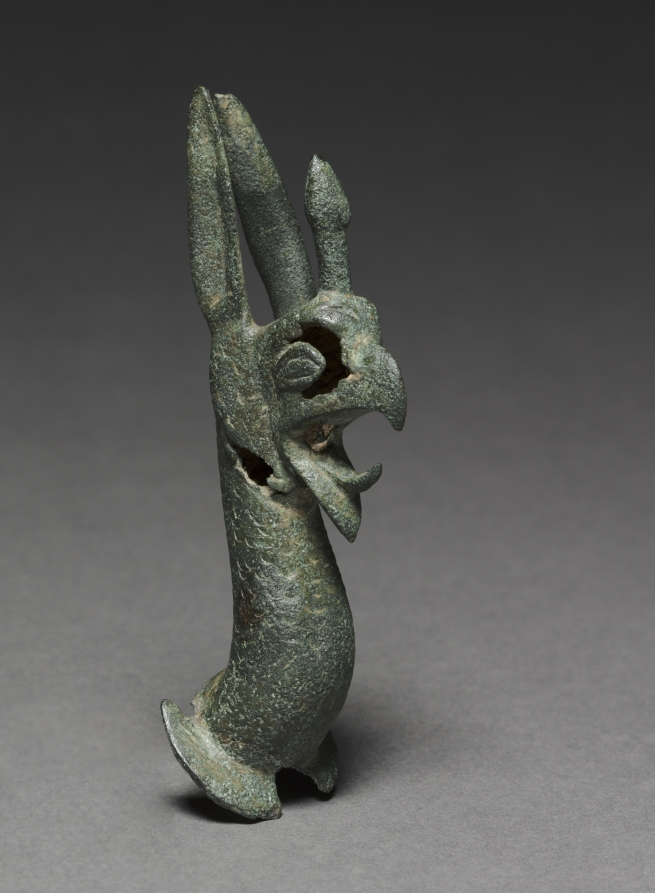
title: Griffin Protome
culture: Greece, Ionian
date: 625–575 BCE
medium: bronze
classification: Metalwork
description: This bird-like head and neck, with sharp beak and tongue, belongs to a griffin, a fantastic bird/lion hybrid prominently found in both Greek and Near Eastern artwork. Often, as here, the griffin has large upright ears (probably feline, in keeping with its lion body) as well as a knob-like projection atop its head. The scaly neck terminates in a flange once pierced with holes for connection to the shoulder of a large bronze cauldron, which would have been ornamented with three or more such griffins.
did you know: Fossilized Protoceratops dinosaur bones may lie behind the eagle/lion form of the mythical griffin.